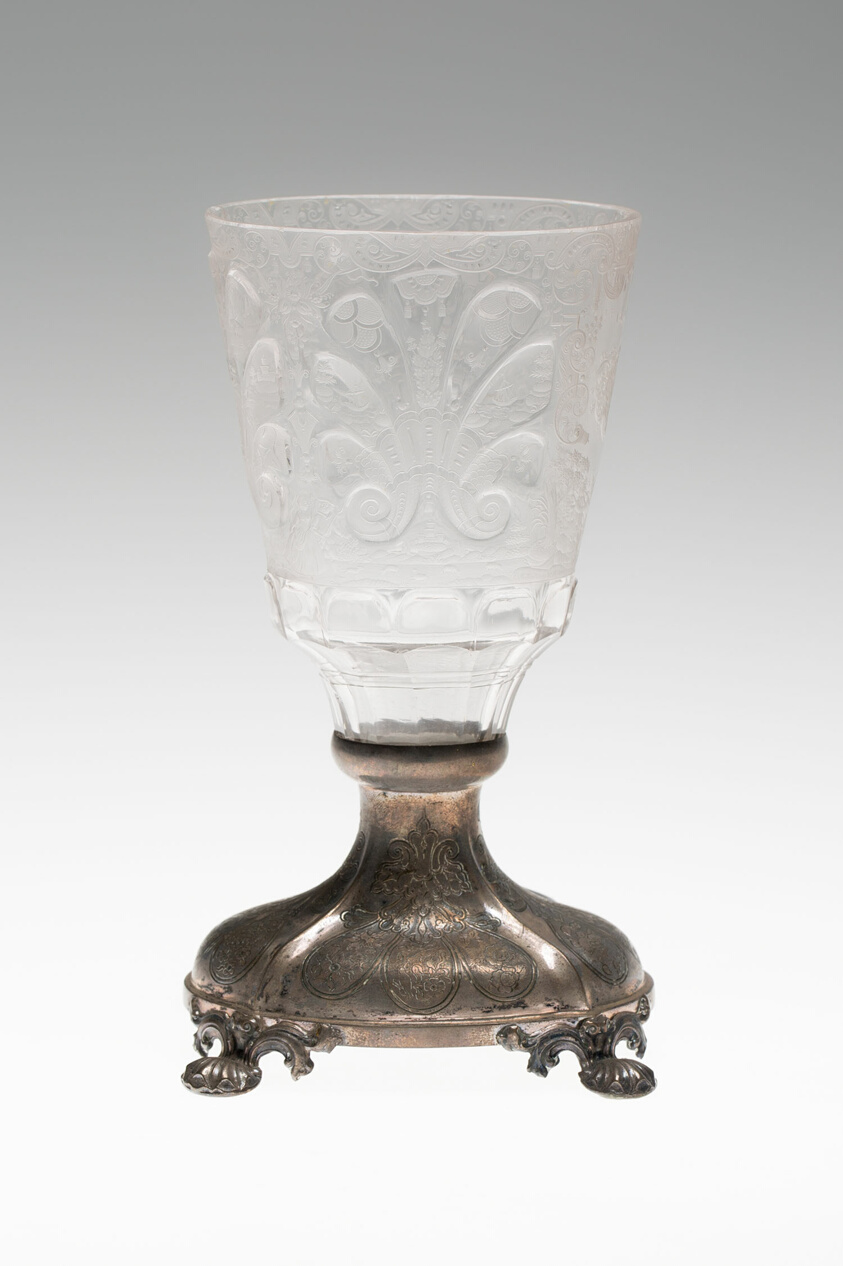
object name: Glass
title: Goblet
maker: Germany; Attributed to Christopher Gottfried Schneider (German, early 18th century)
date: c. 1745 (glass) 1850 (mount)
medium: Glass with silver base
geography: Bohemia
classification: drinking vessel; glass; european decorative arts